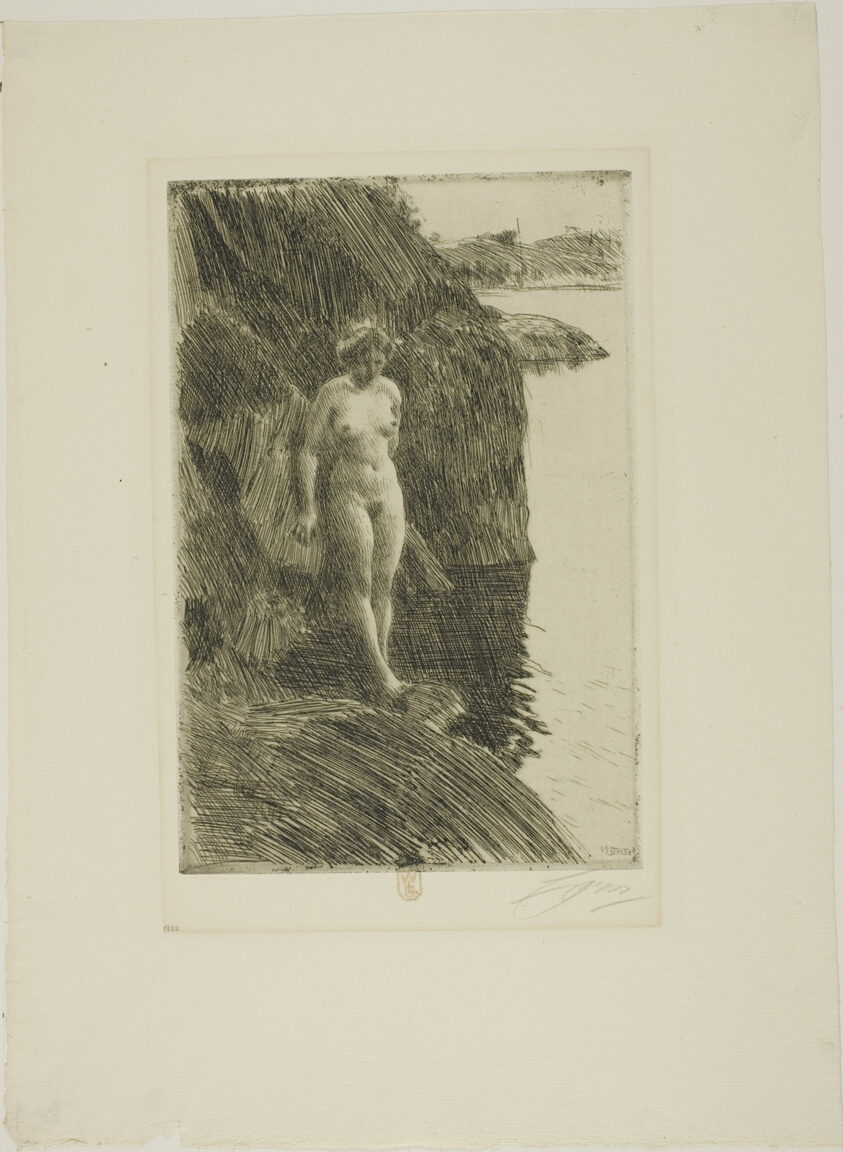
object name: Print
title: Precipice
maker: Anders Zorn (Swedish, 1860-1920)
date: 1909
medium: Etching on ivory laid paper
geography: Sweden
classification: etching; print; prints and drawing